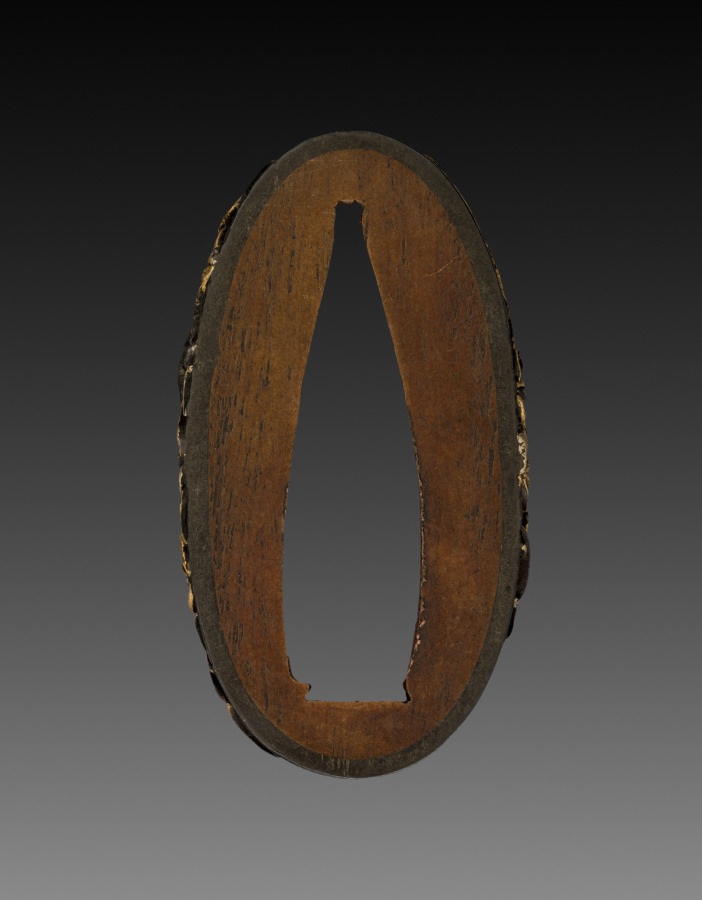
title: Sword-Hilt Collar (Fuchi)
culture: Japan, Edo period (1615–1868)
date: 1700–1850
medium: shakudo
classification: Arms and Armor